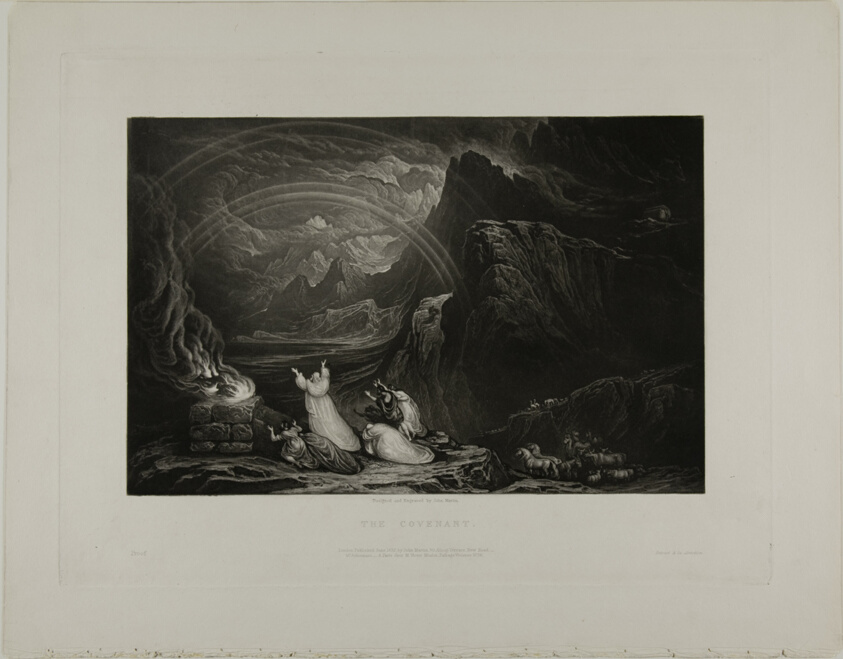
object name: Print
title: The Covenant, from Illustrations of the Bible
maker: John Martin (English, 1789-1854)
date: 1832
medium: Mezzotint in black on ivory wove paper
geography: England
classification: mezzotint; print; prints and drawing